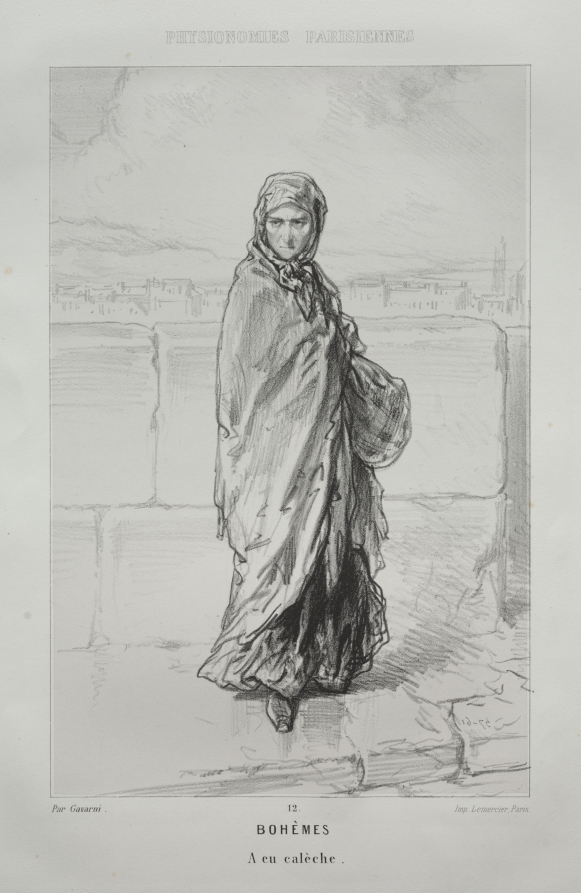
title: Bohèmes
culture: France, 19th century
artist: Paul Gavarni (French, 1804–1866)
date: c. 1857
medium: lithograph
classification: Print